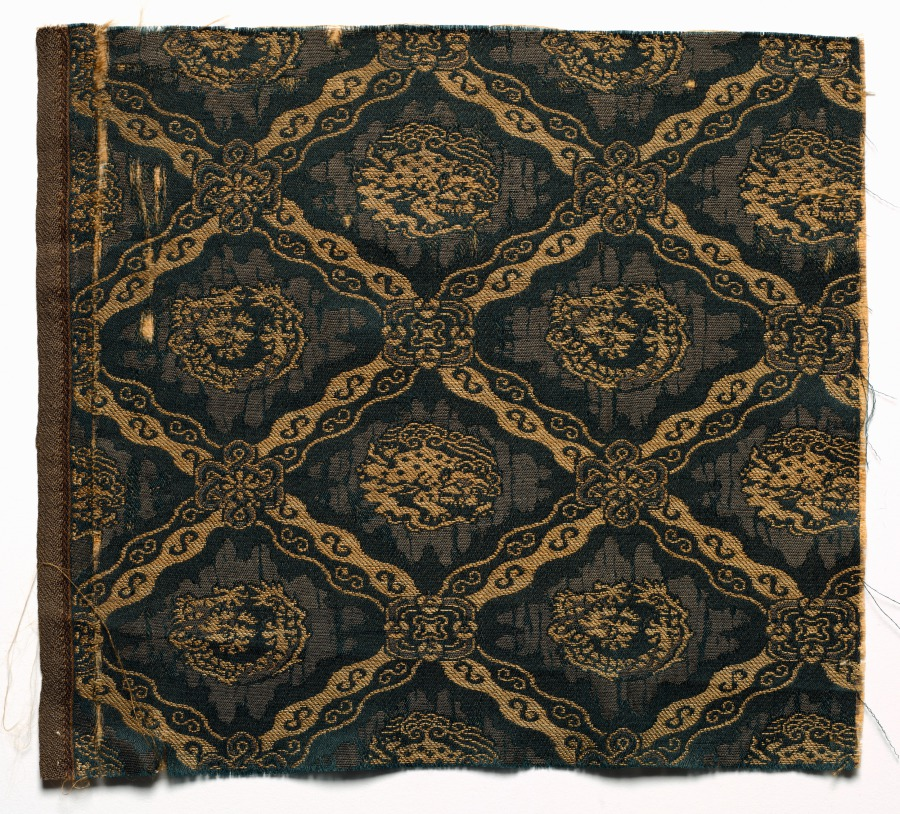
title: Textile Fragment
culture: Japan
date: 1800s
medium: silk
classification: Textile